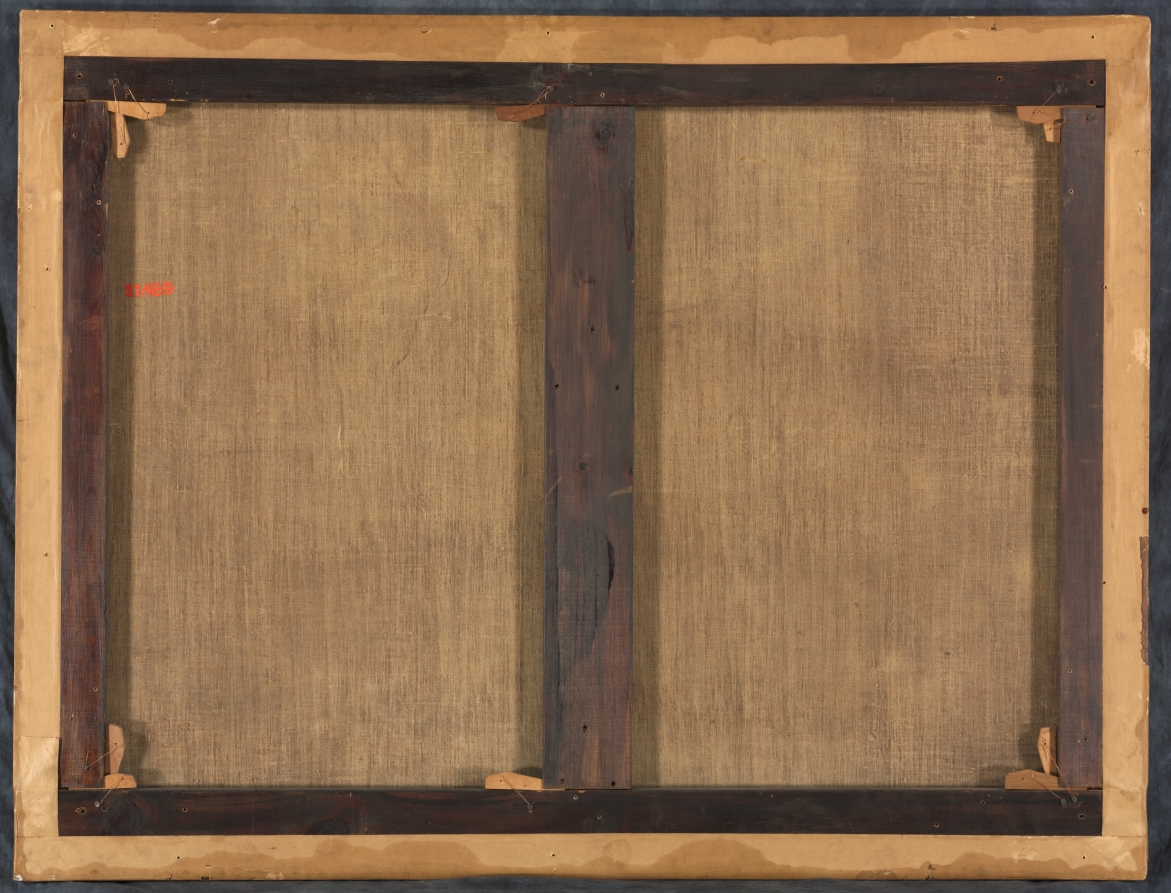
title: Children Dancing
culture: France, 17th century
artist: circle of Le Nain (French)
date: c. 1650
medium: oil on canvas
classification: Painting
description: Antoine, Louis, and Mathieu Le Nain were brothers who ran a collective studio in Paris from around 1630 until 1648, when Antoine and Louis died. Mathieu continued to produce work under their name "Le Nain" throughout the 1650s. Of the museum's four paintings that have been called "Le Nain" (1958.174, 1958.175.1, 1958.175.2), this work has held its attribution to Mathieu the longest. With his back to the viewer, a musician sits in shadow while a group of children pose patiently in a chain-like formation, awaiting the start of their dance. Because of its reliance on order and collaboration, dancing symbolized familial harmony. The attention to the individuality of the children suggest a family portrait, while their wistful expressions and melancholic tone have led to the hypothesis that the children are portraits-both living and posthumous. The description of the intricate lace and the wearied expressions of the slim boys is characteristic of Mathieu's handling. However, the canvas has been attributed to one of Mathieu's followers, the Master of the Games, because of the static, brightly lit figures whose elongated shadows don't quite describe their forms.